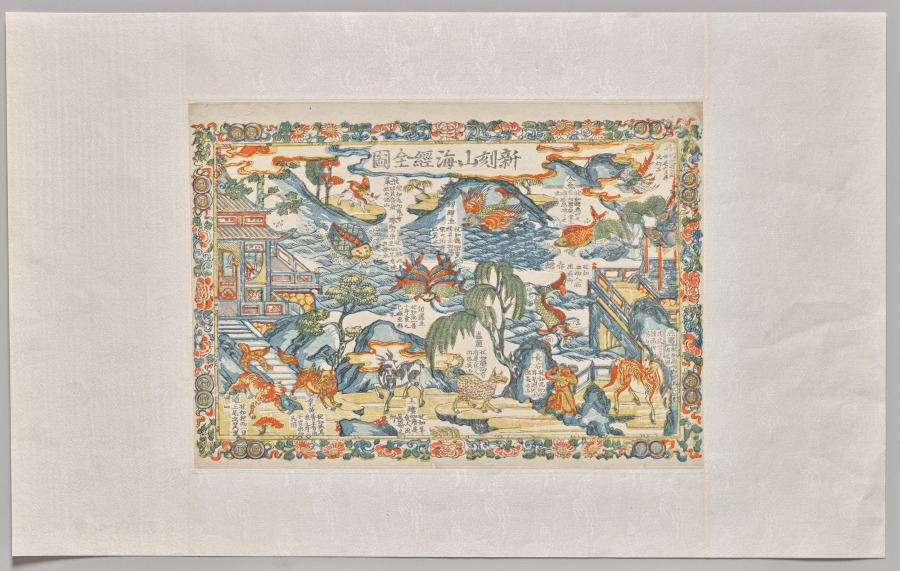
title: A Newly-Cut Print of Illustrations from The Classic of Mountains and Seas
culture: China, Qing dynasty (1644–1911), Jiaqing period (1796–1820)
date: 1796–1820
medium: Polychrome woodblock print; ink and color on paper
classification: Print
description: In the 1600s, printing flourished in such Jiangnan cities as Nanjing, Suzhou, Hangzhou, and Huizhou, evolving from privately enjoyed illustrated books printed in color to more commercialized single-sheet color prints that were hung on walls and became part of the rich urban visual culture.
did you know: Woodblock printing in color reached a height in China in the 1600s to 1700s. The prints were executed by means of sets of separate blocks, each carved to print a different color.